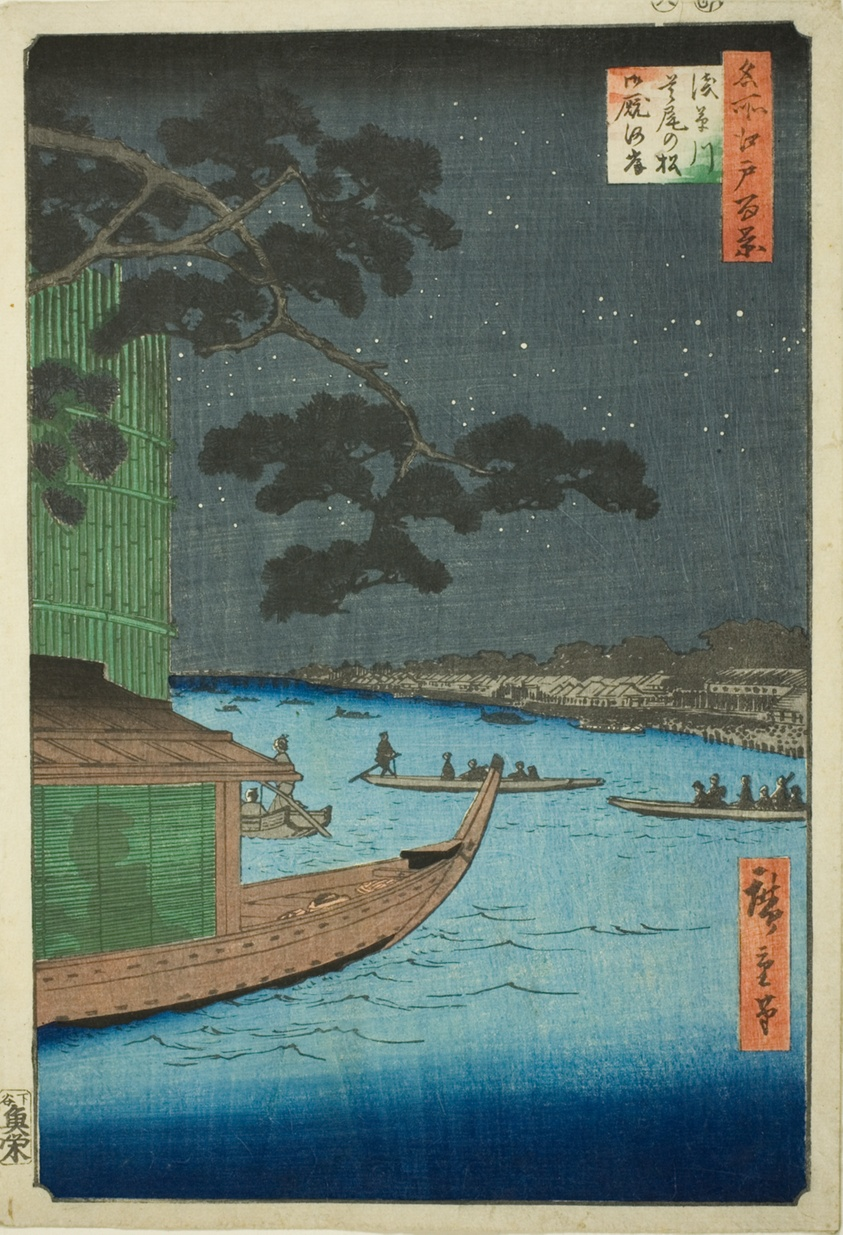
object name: Print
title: The Pine of Success and Onmayagashi, Asakusa River (Asakusagawa shubi no matsu Oumayagashi), from the series One Hundred Views of Edo (Meisho Edo Hyakkei)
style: Japanese (culture or style)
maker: Utagawa Hiroshige 歌川 広重; Japanese, 1797-1858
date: 1856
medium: Color woodblock print; ōban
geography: Japan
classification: woodblock print; print; asian art